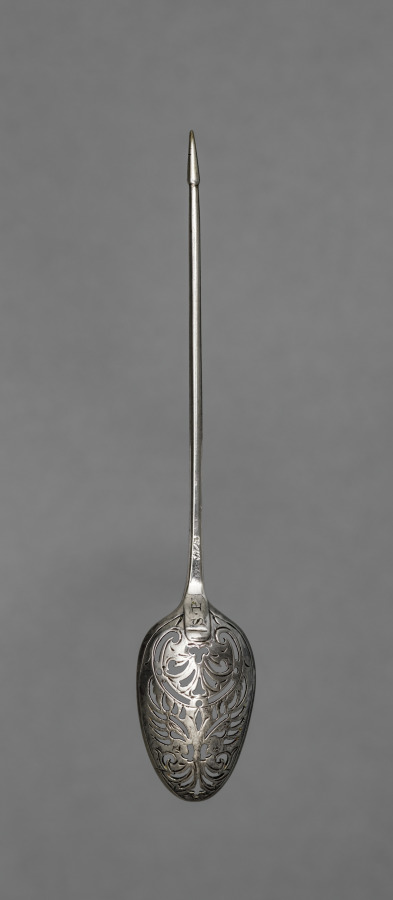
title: Strainer Spoon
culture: America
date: 18th Century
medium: silver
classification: Silver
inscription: engraved: "S.P" in block letters on back of bowl.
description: The bowl of this spoon was used to remove the unwanted debris from punch, while the spike at the other end of the handle could spear a slice of lemon.